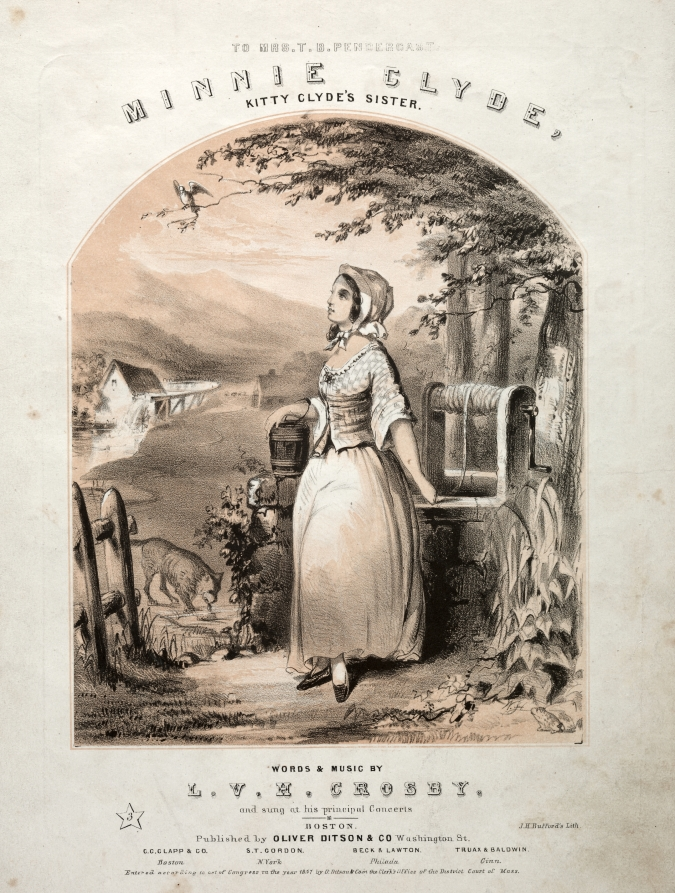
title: Minnie Clyde - Sheet Music Cover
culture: America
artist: Winslow Homer (American, 1836–1910)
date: 1857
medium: lithograph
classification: Print